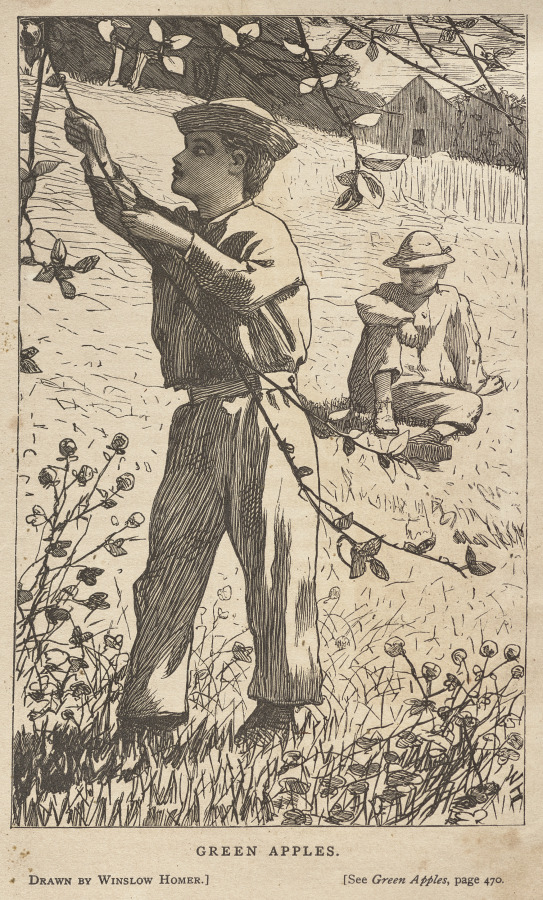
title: Green Apples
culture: America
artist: Winslow Homer (American, 1836–1910)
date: 1868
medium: wood engraving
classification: Print